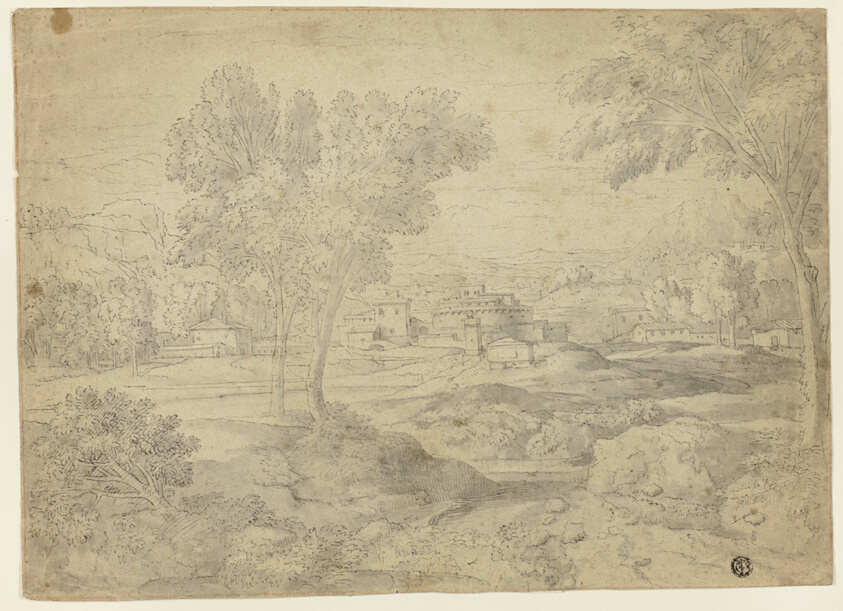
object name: Drawing and Watercolor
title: Italianate Landscape with Buildings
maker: Follower of Nicolas Poussin (French, 1594-1665); possibly Étienne Allegrain (French, 1644–1736)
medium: Pen and black ink and brush and gray wash on tan laid paper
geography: France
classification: pen and ink drawings; drawings (visual works); prints and drawing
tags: landscapes